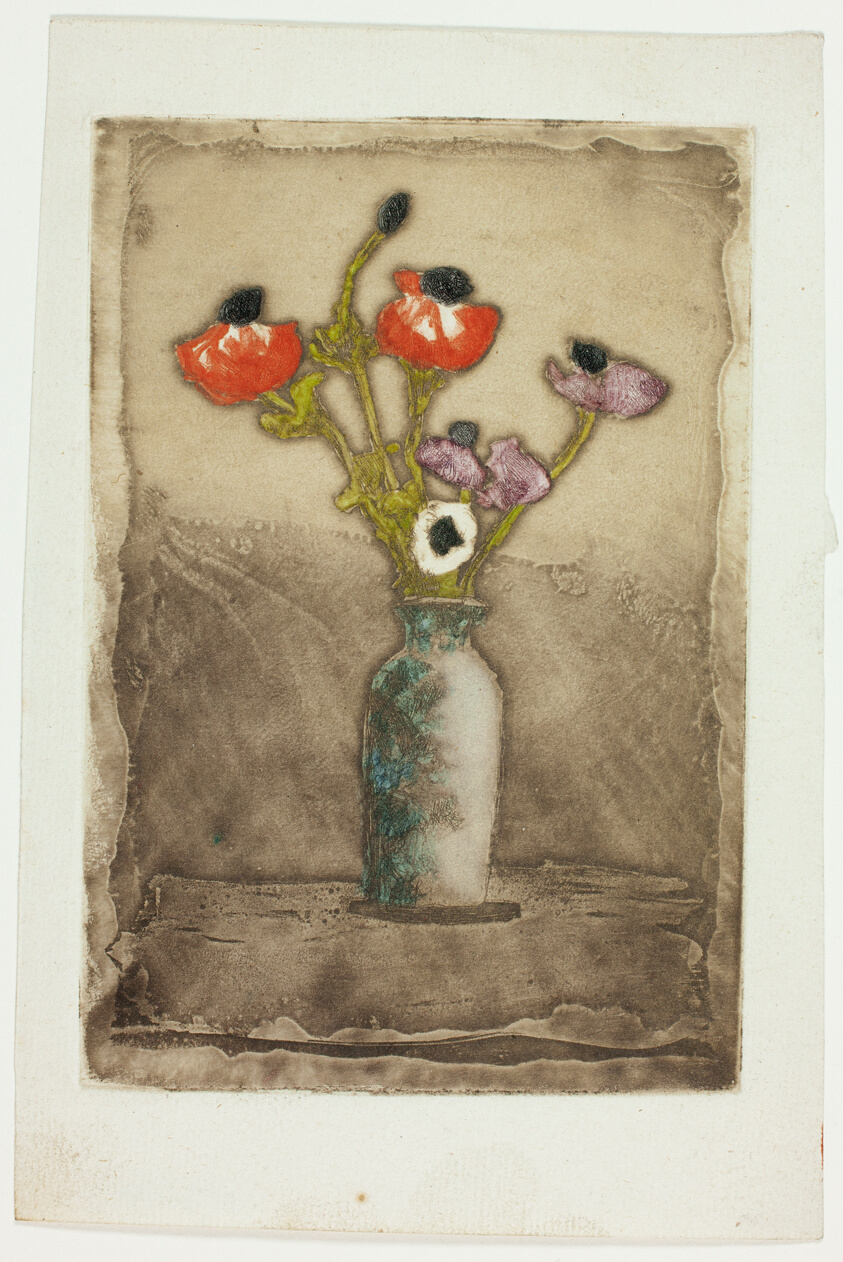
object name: Print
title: Anemonies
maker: Theodore Roussel (French, worked in England, 1847-1926)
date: 1897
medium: Color etching and aquatint on ivory laid paper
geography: England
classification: etching; aquatint; paper; print; prints and drawing